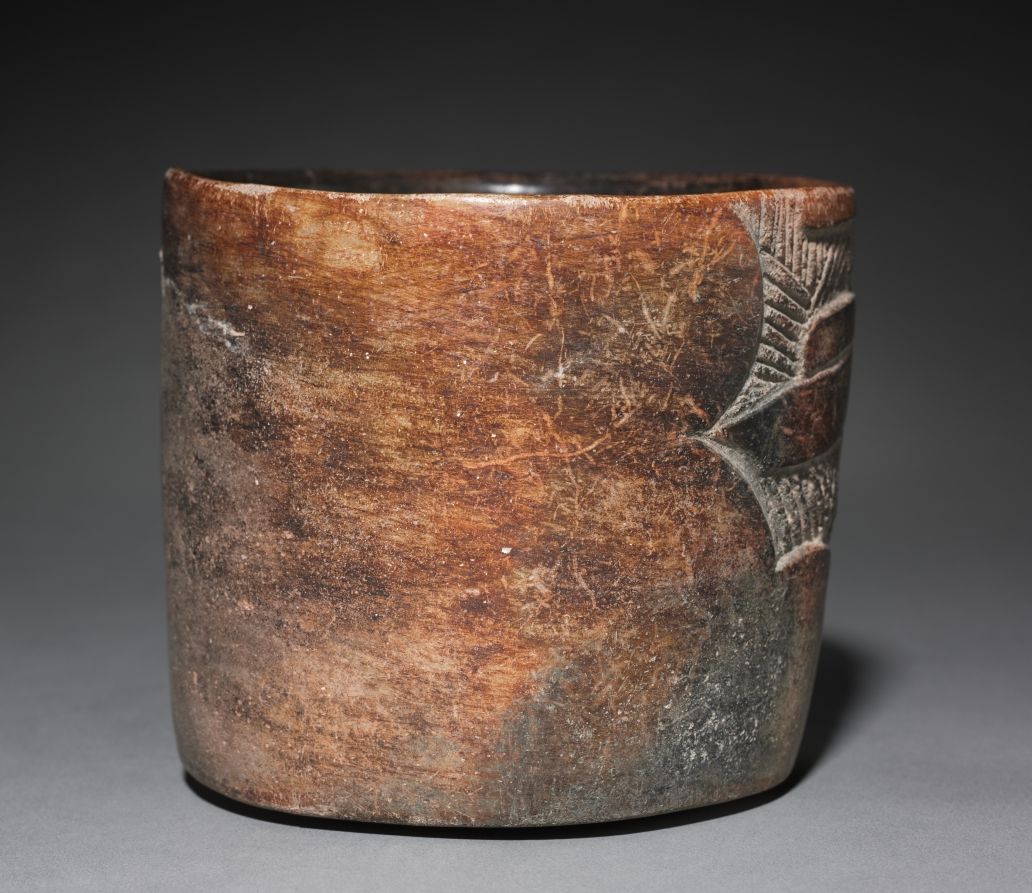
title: Carved Bowl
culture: Mexico, Central Highlands, Olmec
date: 1200–900 BCE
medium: earthenware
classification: Ceramic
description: Although the Olmec heartland is located on Mexico's Gulf Coast, sites with Olmec-style architecture and sculpture are also found in the highlands of Central Mexico. Small-scale Olmec works in jade and pottery are even more widely distributed; their ownership probably conferred great prestige.